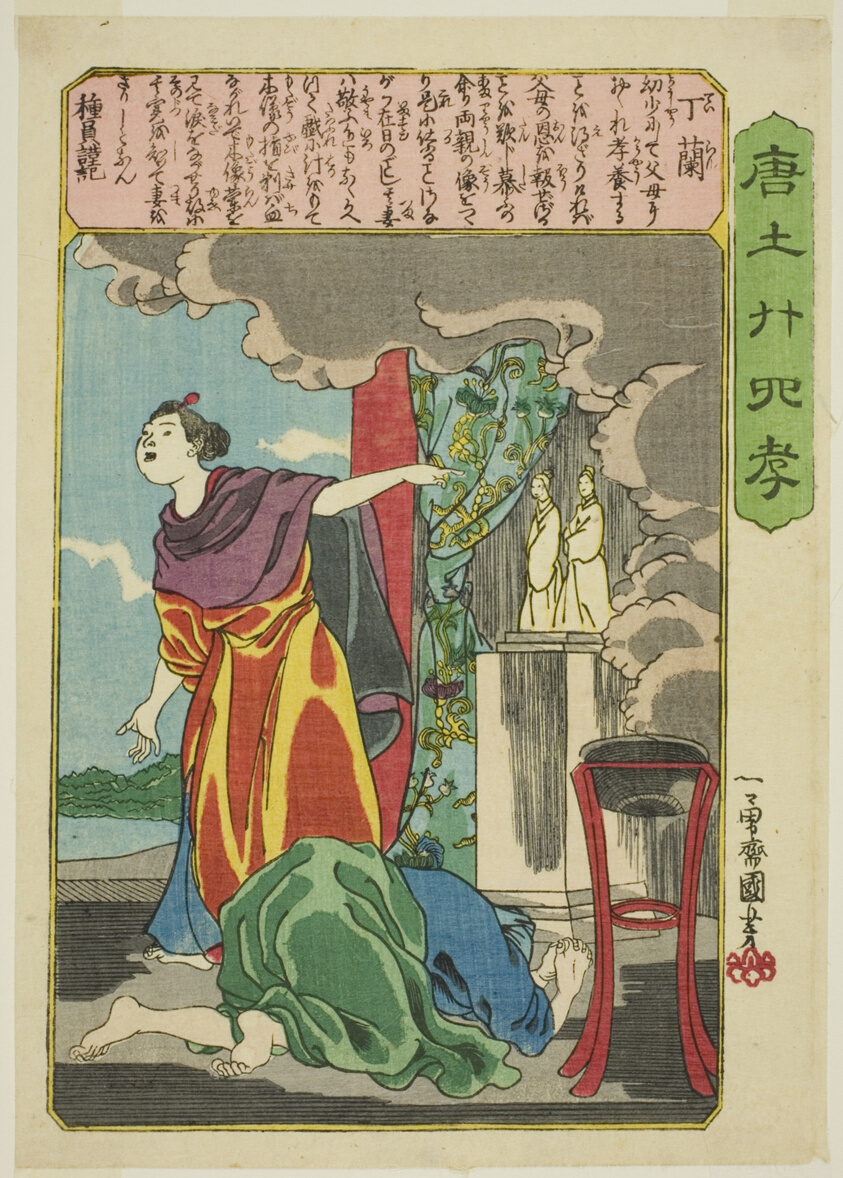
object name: Print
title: Ding Lan (Tei Ran), from the series "Twenty-four Paragons of Filial Piety in China (Morokoshi nijushiko)"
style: Japanese (culture or style)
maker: Utagawa Kuniyoshi (Japanese, 1797-1861)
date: c. 1848/50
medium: Color woodblock print; chuban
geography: Japan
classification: woodblock print; print; asian art